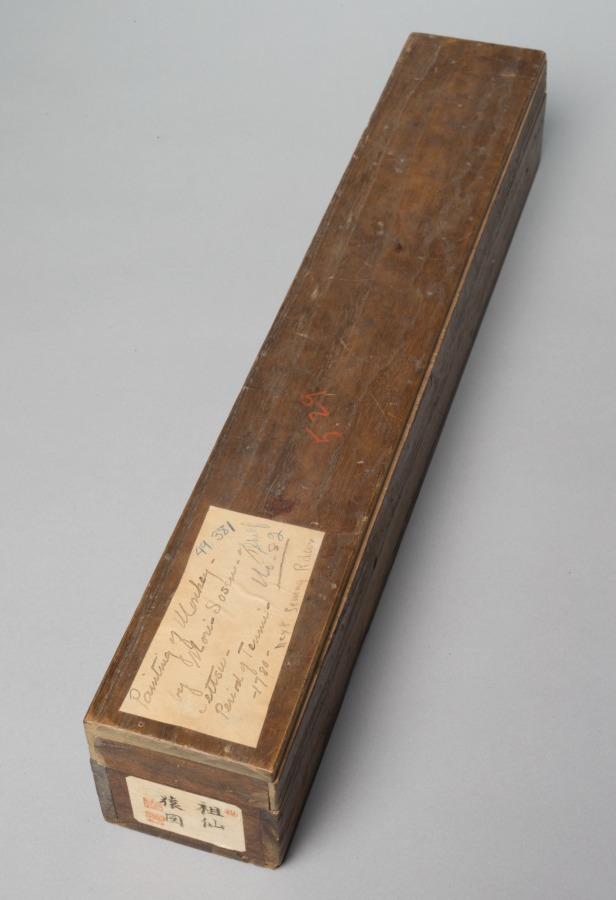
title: Monkey Hanging on to a Branch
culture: Japan, Edo period (1615–1868)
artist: Mori Sosen (Japanese, 1747–1821)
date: 1780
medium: hanging scroll; color on paper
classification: Painting